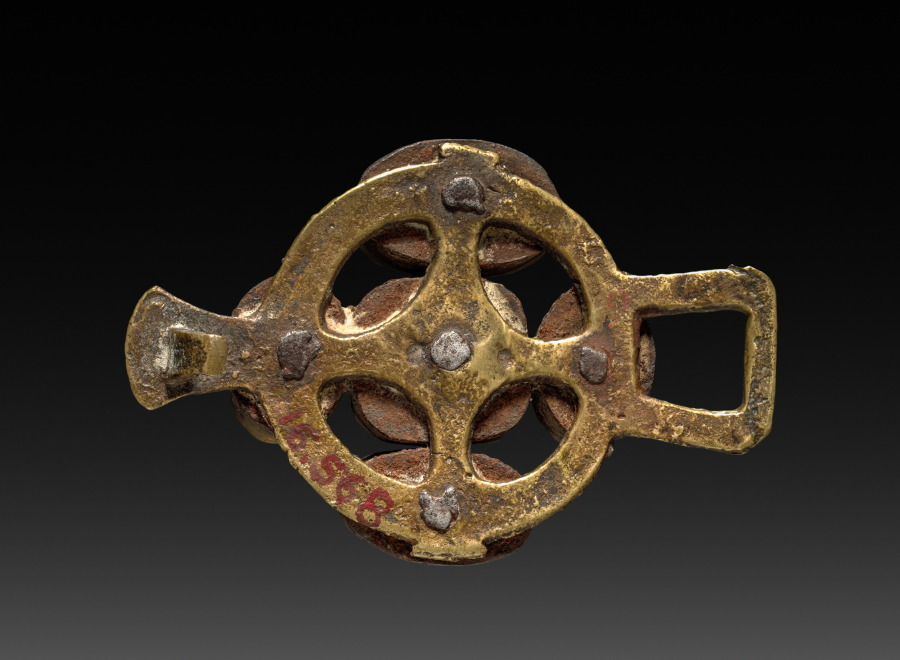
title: Clasp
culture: Tibet(?)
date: 1800s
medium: silver with cornelian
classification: Jewelry